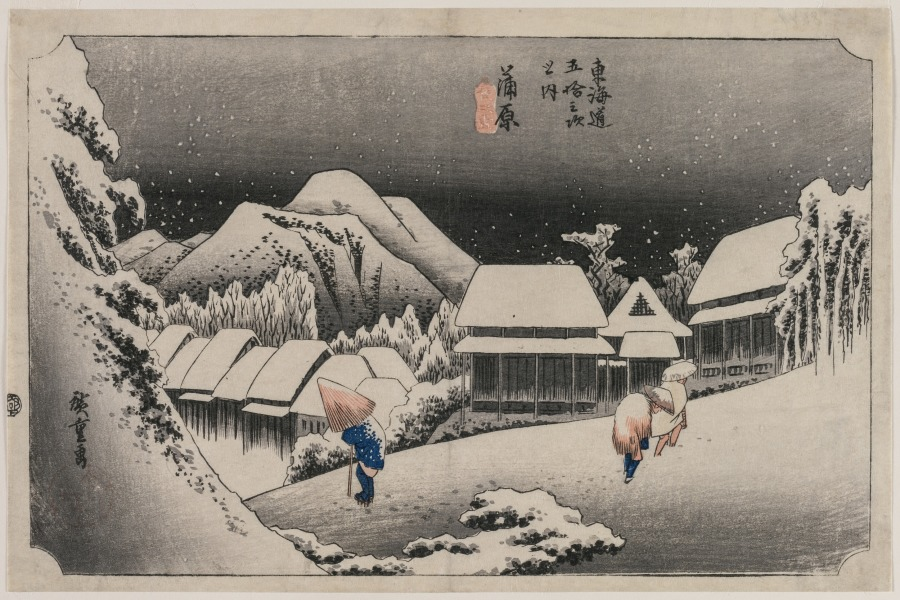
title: Evening Snow at Kambara (number sixteen of the series Fifty-three Stations of the Tokaido)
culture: Japan, Edo period (1615–1868)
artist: Utagawa Hiroshige (Japanese, 1797–1858)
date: 1833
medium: color woodblock print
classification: Print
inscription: Signature: Hiroshige ga. Publisher: Takenouchi Magohachi (Takenouchi). Censorship Seal: kiwame.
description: The coastal town of Kambara rarely experiences snowfall. Illustrating falling snow is particularly suited to woodblock prints. The snowflakes are created by carving their shapes out of the woodblock. When the surface of the block is inked and printed, the carved areas are represented by the unprinted white paper. This print may be the first by Hiroshige to depict falling snow.